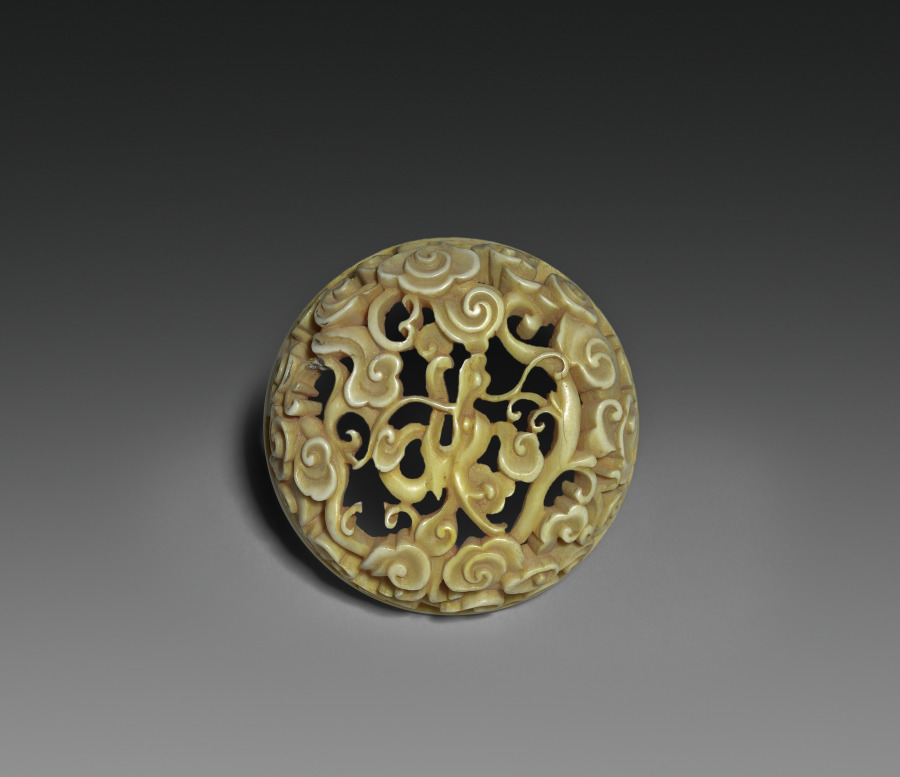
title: Ivory Lid for Water Pot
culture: China, Jiangxi province, Jingdezhen, Qing dynasty (1644-1911), Kangxi period (1662-1722)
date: 1662–1722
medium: ivory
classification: Ceramic